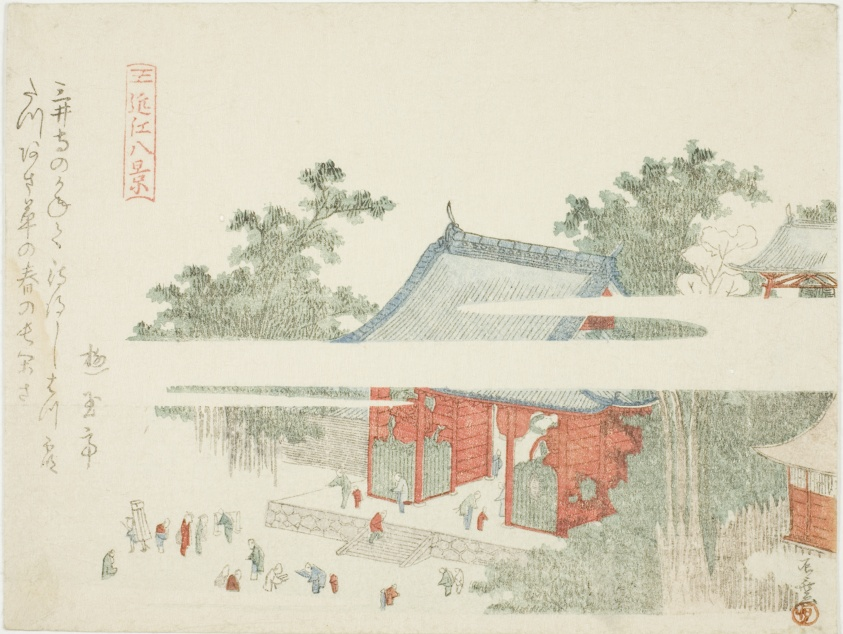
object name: Print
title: Mii Temple, from the series "Eight Views of Omi (Omi hakkei)"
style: Japanese (culture or style)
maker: Ryuryukyo Shinsai (Japanese, c. 1764-1820)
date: early 19th century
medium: Color woodblock print; surimono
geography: Japan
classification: woodblock print; print; asian art